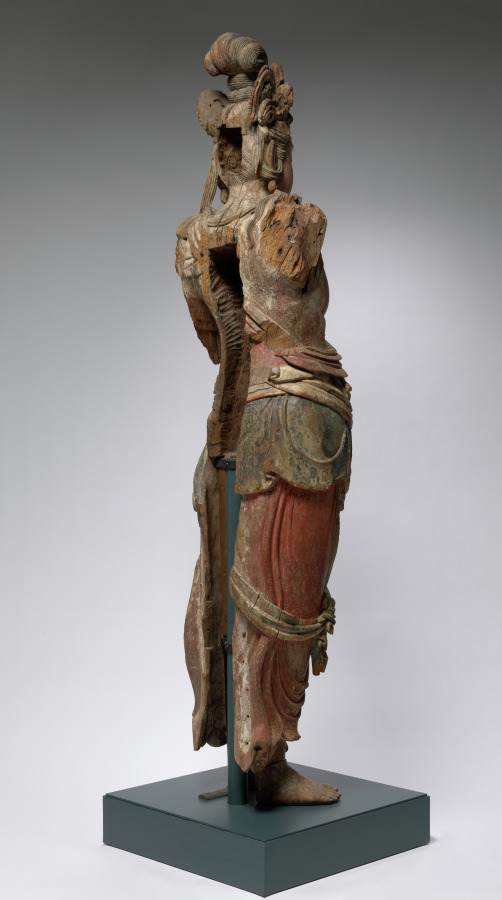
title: Eleven-Headed Guanyin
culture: China, late Northern Song dynasty (960-1127) - Jin dynasty (1115-1234)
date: 1100–1200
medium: wood with polychromy and cut gold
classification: Sculpture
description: The bodhisattva is an enlightened being dedicated to the spiritual awakening of all beings. The compassionate bodhisattva Guanyin, in a variety of manifestations, is probably the most popular deity of worship in Chinese Buddhism. In the Esoteric Buddhist form shown here, this standing Guanyin has a total of eleven heads, with smaller ones above the principal head. The uppermost head represents the Buddha Amitabha, to whom he is closely related. The eleven heads symbolize the Buddha’s steps on the path to enlightenment.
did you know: This Guanyin is carved from a single block of willow (genus Salix sp.).